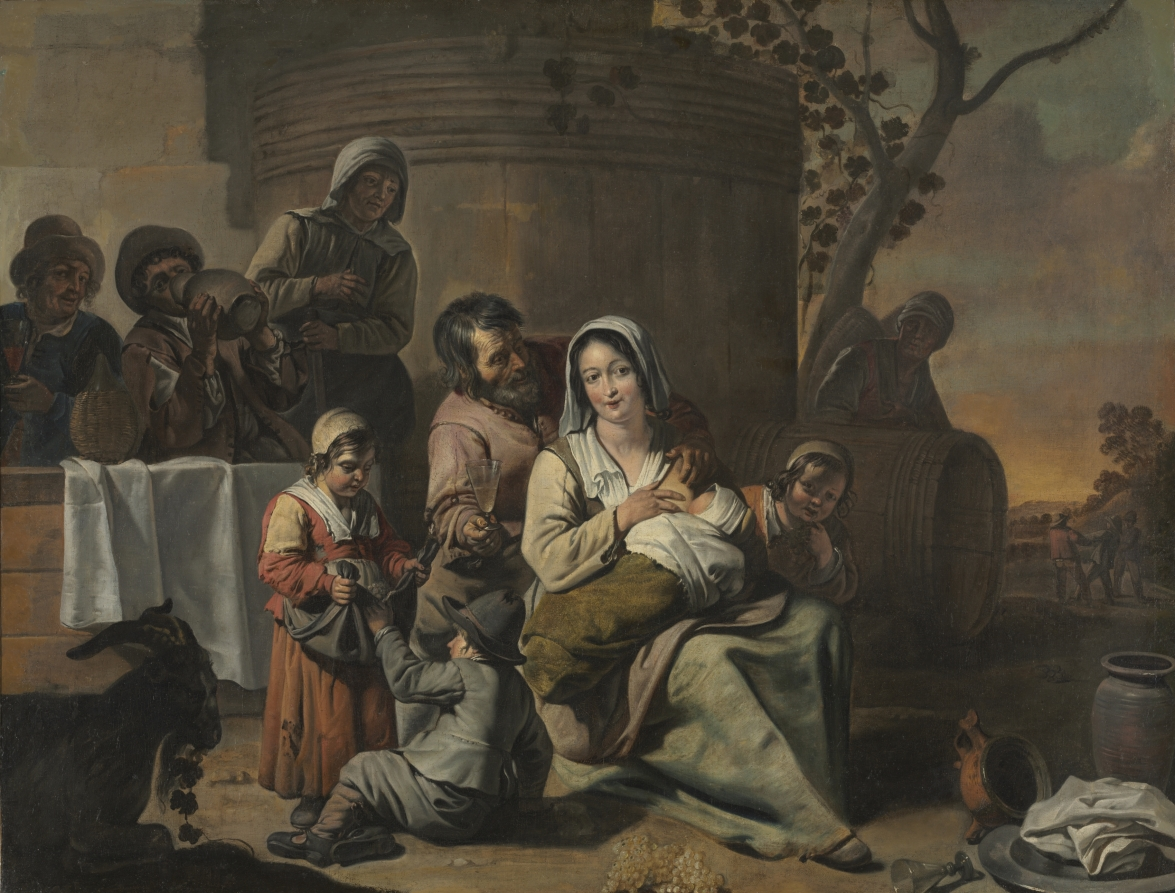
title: Vintage Scene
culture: France, 17th century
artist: circle of Le Nain (French)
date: 1650s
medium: oil on canvas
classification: Painting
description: The mid-17th century saw revived interest in representations of the lower classes. Artists like the Le Nain brothers in France painted scenes that looked back to the Renaissance tradition of pastoral imagery. The Le Nain often depicted ordinary country folk going about their daily business, subjects and figures they remembered from their childhood in rural Laon. Considered a companion piece to Peasant Children Dancing (1958.175.2), Vintage Scene has also been attributed to the Master of the Béguins, a Flemish artist who worked in the manner of the Le Nain in Paris. Here, good-natured though bawdy men drink in the background shade, while a sweet-faced young woman in the center surrounded by chubby children flashes the viewer a coy smile that reveals her awareness of the slowly creeping hand of her drunk companion. While peasants drinking was a popular subject among Flemish artists, the theme of wine connects the subject with the grape harvest, which recalls the Le Nain's agricultural homeland in France. This use of both aesthetic and biographical aspects of the Le Nain's lives demonstrates the Master of Béguins's ability to absorb the stylistic and thematic lessons of the famous brothers.